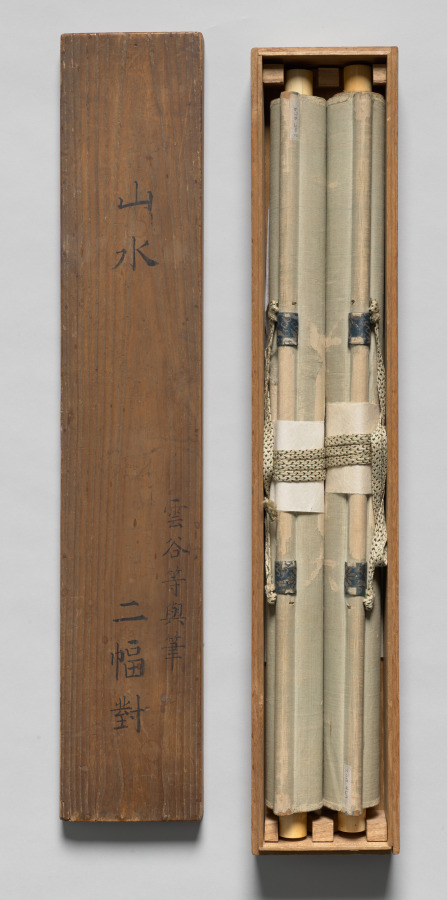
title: Landscapes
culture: Japan, Edo period (1615–1868)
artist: Unkoku Tōyo (Japanese, 1612–1688?)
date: mid- to late 1600s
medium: pair of hanging scrolls; ink and light color on paper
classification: Painting